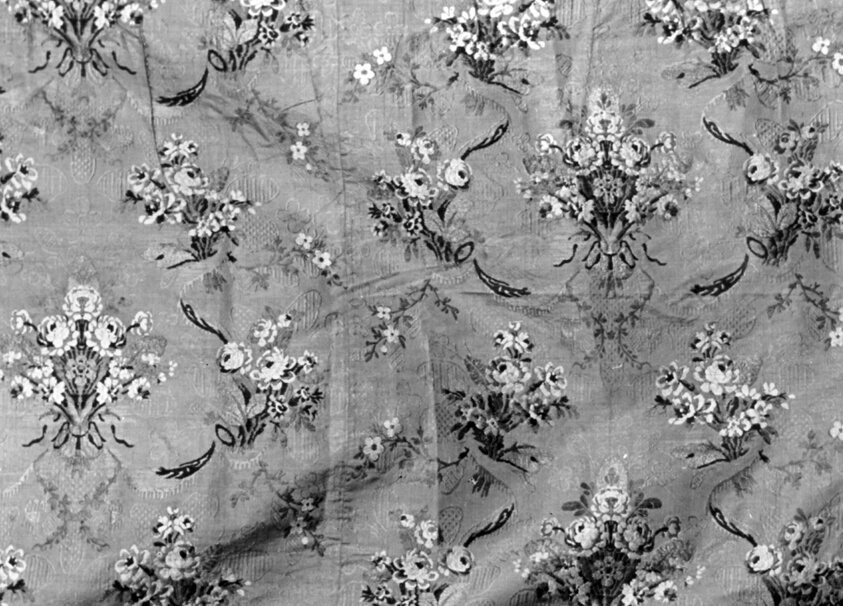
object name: Textile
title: Panel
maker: France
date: 18th century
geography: France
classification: textile; weaving